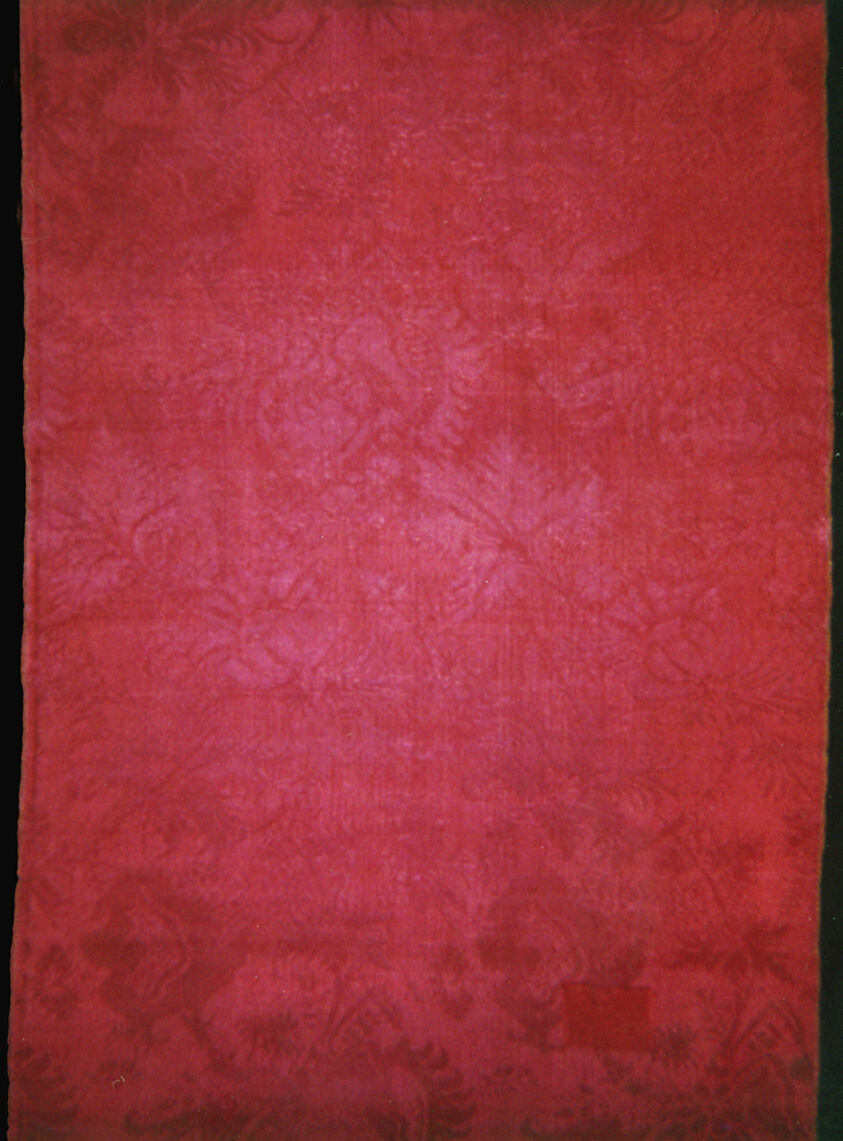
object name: Textile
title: Panel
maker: France or Italy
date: 1690s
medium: Silk, 4:1 satin damask weave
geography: France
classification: textile; weaving